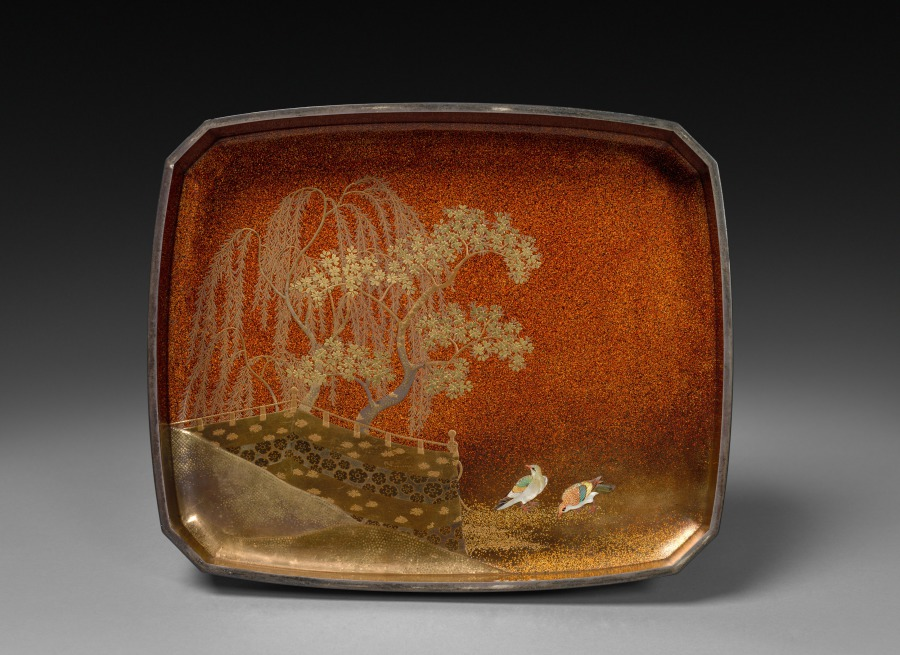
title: Box with Landscape (lid)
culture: Japan, Edo period (1615–1868) to Meiji period (1868–1912)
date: 1800s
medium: lacquer with sprinkled gold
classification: Lacquer